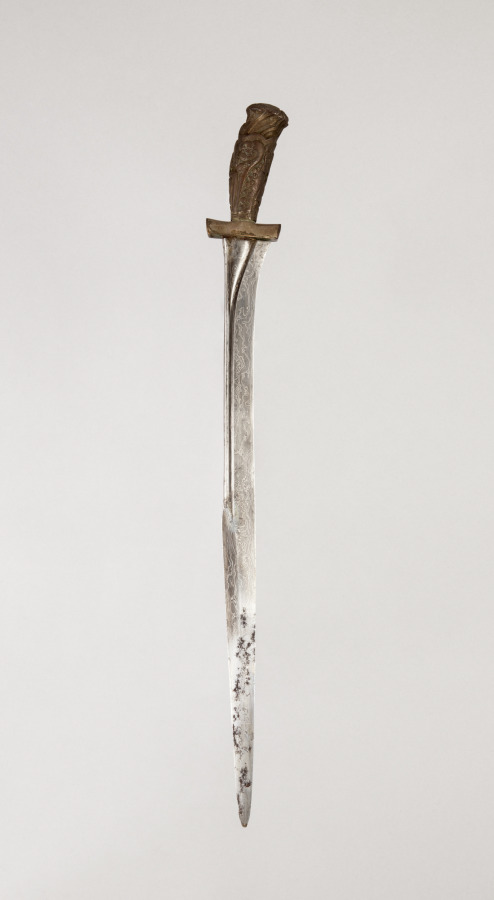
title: Sword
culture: Java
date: 1800s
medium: iron and silver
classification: Arms and Armor